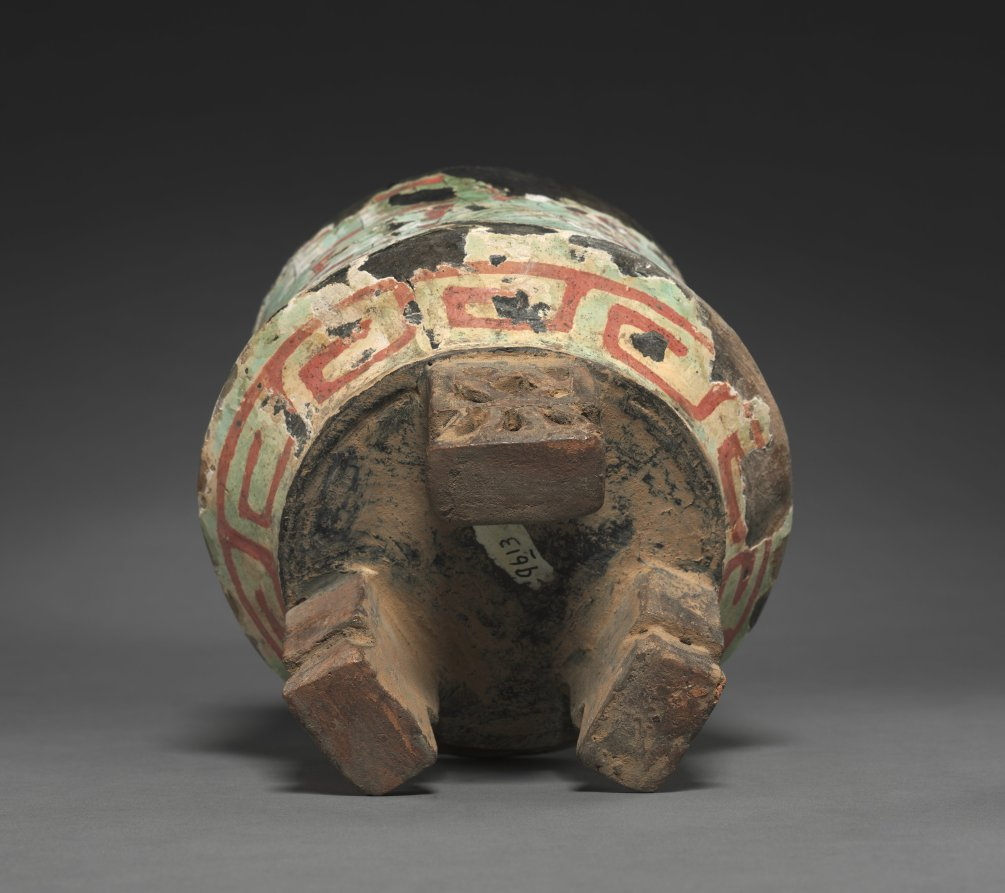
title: Vessel with Butterfly Headdress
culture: Central Mexico, Teotihuacán, Classic period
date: 1–550 CE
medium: ceramic, stucco, pigment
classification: Ceramic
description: The headdress shown on this vessel combines a serpent's mouth with a butterfly's proboscis (feeding tube), which curls between the eyes. The butterfly often appears in the headdress of the Great Goddess, an extremely important Teotihuacán deity. Stucco (paper-thin, painted plaster) is fragile and usually does not survive well; the stucco of the basin in this case has been repaired.